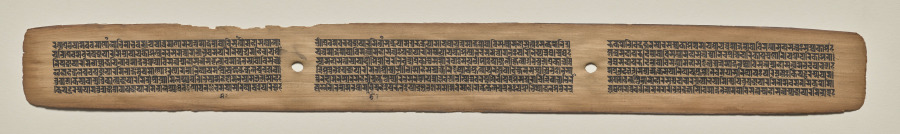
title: Text, folio 180 (recto), from a Manuscript of the Perfection of Wisdom in Eight Thousand Lines (Ashtasahasrika Prajnaparamita-sutra)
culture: Eastern India, Bihar, Vikramashila Monastery. Painting: Nepal, Kathmandu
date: Sunday, September 14, 1119 (year 239 of the Newar Samvat in the month of Ashvina)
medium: gum tempera and ink on palm leaves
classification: Painting